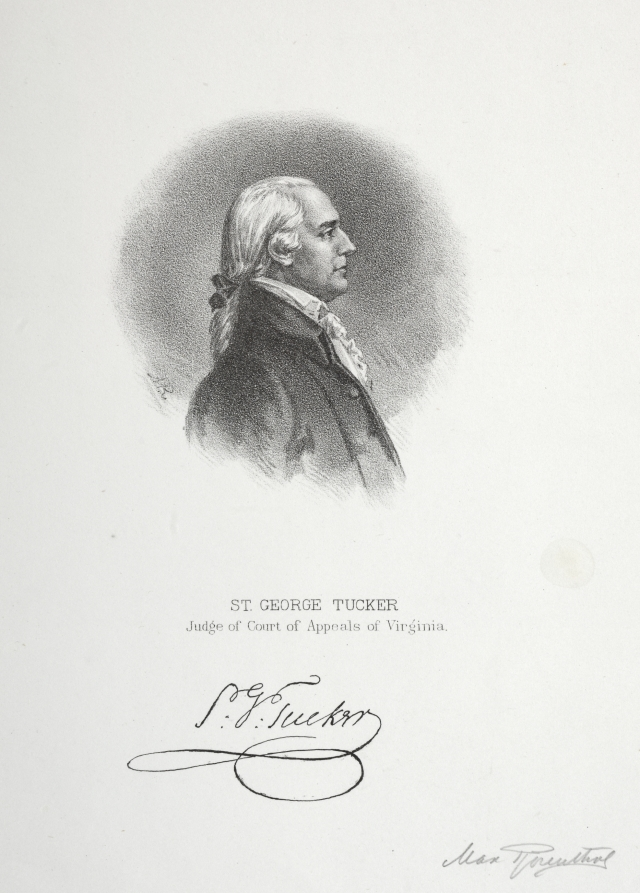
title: St. George Tucker, Judge of Court of Appeals of Virginia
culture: America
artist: Max Rosenthal (American, 1833–1918)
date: c. 1900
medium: lithograph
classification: Print